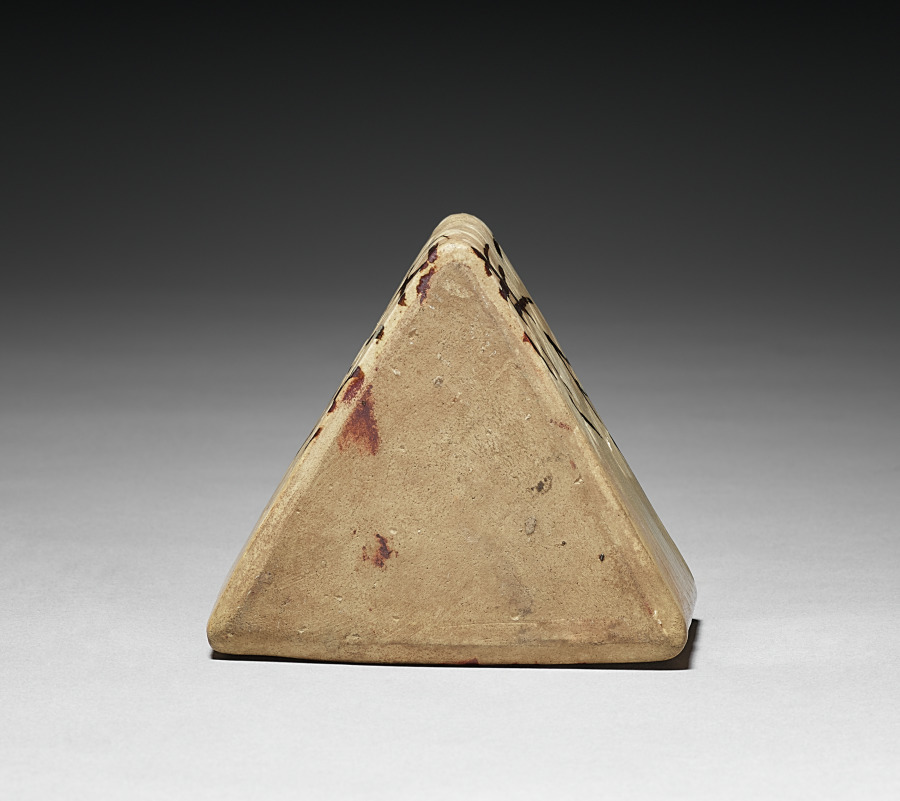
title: One of Five Serving Bowls (Mukozuke) with Prunus Design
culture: Japan, Edo period (1615–1868)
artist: school of Ogata Kenzan (Japanese, 1663–1743)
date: 1700s to mid-1800s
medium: Kyoto Ware: stoneware with underglaze iron oxide and slip decoration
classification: Ceramic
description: Note the rough, tan, clay bodies of these bowls with their deliberate irregularities. The design of branches was first painted in a black iron oxide, then the blossoms and buds in a white slip, followed by the application of a very thin transparent overglaze.